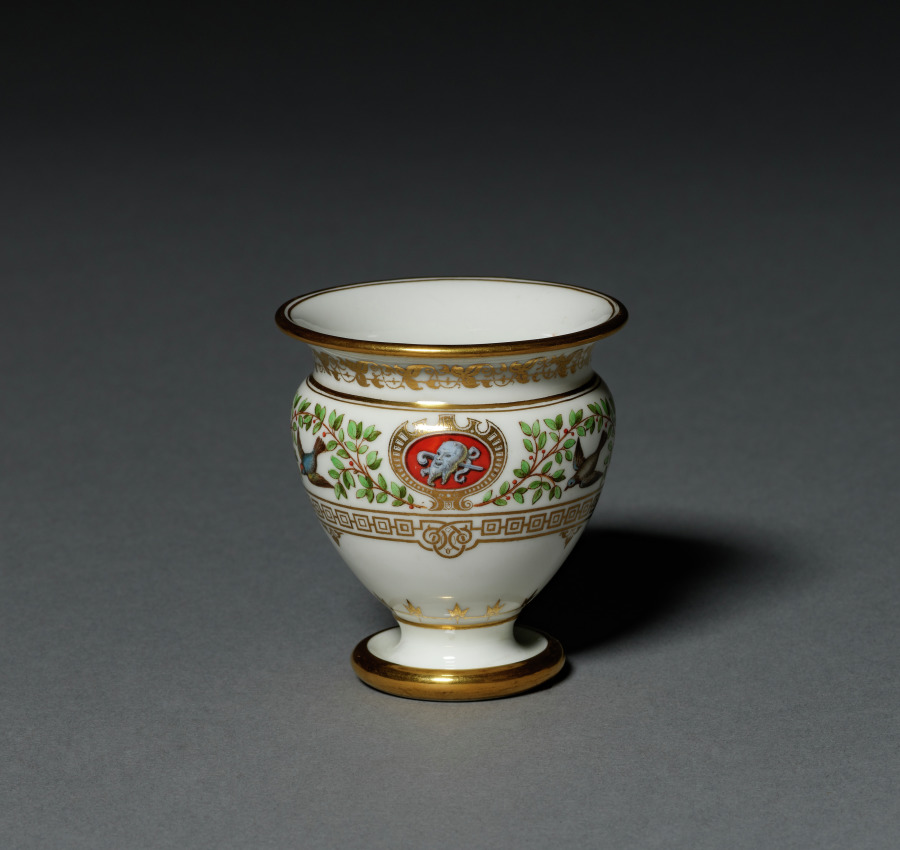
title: Cup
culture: France, Sèvres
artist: Sèvres Porcelain Factory (French, est. 1756)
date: 1839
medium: hard-paste porcelain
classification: Ceramic